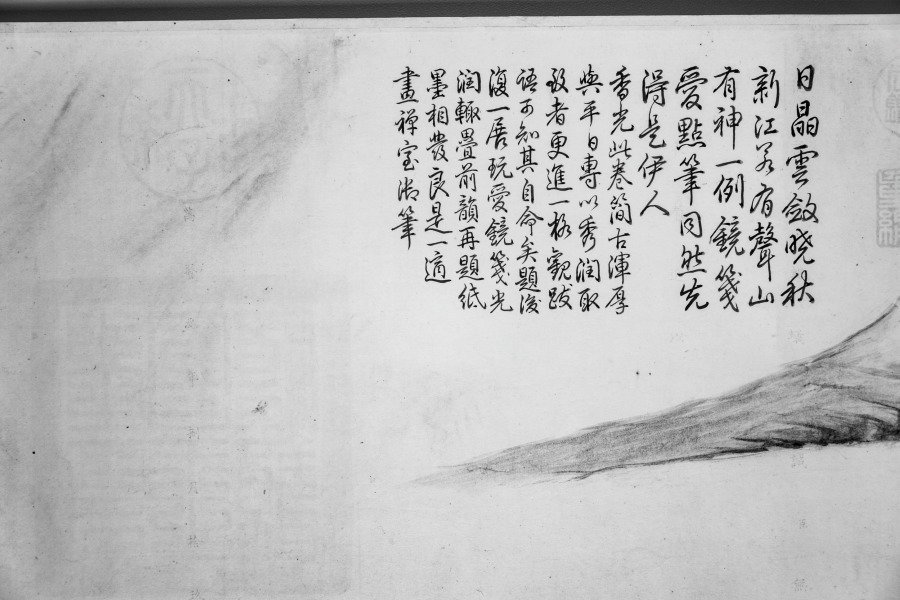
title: River and Mountains on a Clear Autumn Day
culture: China, Ming dynasty (1368–1644)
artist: Dong Qichang (Chinese, 1555–1636)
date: c. 1624–27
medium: Handscroll; ink on Korean paper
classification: Painting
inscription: 黃子久江山秋霽似此，當恨古人不見我也。思翁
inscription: 董文敏每遇高麗鏡面箋，書畫尤為入神。此卷改表紙用之，字跡隱然，兼有朝鮮之印。至於筆法圓秀，真接倪黃。豈文沈所可同日而語也。 康熙庚午中秋後一日，天氣澄爽，重裝初畢，跋於瓶廬。抱瓮翁高士奇。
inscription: Second inscription by Gao Shiqi 高士奇 (1645–1704): On the twenty-third day of the ninth month, the jiaxu year of the Kangxi era [1694], I packed my bags to head north. When my boat passed Wuchang [Suzhou], Mr. Mantang [Song Luo] brought wine to bid me farewell so that we could share our thoughts on our separation in the last few years. I showed him the paintings and calligraphy which I collected and asked his opinions. Since Mr. Mantang does not own any handscrolls by Wenmin [Dong Qichang], I leave this one for him in commemoration of our parting; thus the painting will have a worthy owner and our meeting will become a beautiful story in the future. It is the fourth day after the beginning of winter, with the sky clear and sober. Trees under frost have turned red and yellow, seemingly echoing the brush and ink in the painting. I also ask Mr. Mantang to inscribe a poem to commemorate our meeting so that it will survive forever.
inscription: 1 colophon and 4 seals of Song Luo 宋犖 (1634–1713): Who is the foremost art connoisseur of our dynasty?/ Tangcun [Liang Qingbiao, 1620–1691] is dead, so the title passes to Jiangcun [Gao Shiqi]./ Leaving office, you retired for five years in the Lake region./ Fondling handscrolls and hanging scrolls from morning to evening./ You sent me your collection catalogue Xiao Xia Lu last year;/ It is indeed the true equal of [Zhou Mi's] Yun Yan Guo Yan./ This year you returned to the capital by imperial order;/ Your boat with calligraphy and paintings anchored at the river bank in Suzhou./ When we met each other you did not waste any time for conversation by poured out immediately/ From your "coral net" extraordinary treasures./ You produced incomparable scrolls, with gold-inscribed labels and jade rollers,/ Pouring out from bags and trunks, they were spread in disarray./ Without a word, I rolled and unrolled until my fingers were numbed,/ We sat straight, facing each other quietly, and never felt tired./ For three days we forgot about sleeping and food./ And at times we shouted our joy out loud, forgetting who is host or guest./ Your Dwelling in the Fuchun Mountains and the Yuansheng manuscript/ These peerless works I myself examined with delight./ As an added pleasure to the farewell dinner under the Maple Bridge,/ You allowed me to hold again this handscroll by Dong Qichang--/ The Misty River and Piled Peaks [by Zhao Mengfu] and this Clear Autumn Day are two extraordinary masterpieces./ In showing such life and spirit with "qi yun." the artists were truly "men of heaven."/ The Clear Autumn Day is not even three feet long,/ Painted on tributary Korean paper, it shines like silver./ Every building up and every turn of the mountains imitates nature,/ Every tree and every rock is removed from the commonplace./ From the beginning, the theory of poetry is the theory of painting,/ Like the lotus and the morning sunshine, they complement and refresh each other./ The artist's inscription regrets that "the Old Masters cannot see my scroll."/ Huang Gongwang would have agreed in his grave./ The vermilion of the seals glitter and dazzles the eyes,/ These added accessories are as valuable as jade./ You are very kind to give it to me,/ The feelings expressed in your inscription are so sincere./ Wanting to refuse, but unable, I accept it to respect your wish,/ And taking off my gown and cap I wrapped it with care./ You asked me to write a long poem in commemoration of this beautiful occasion,/ I am too ashamed that my effort in response is so poor and inadequate./ Returning home, I unrolled it under candlelight, trying to write the colophon,/ The light of the waning moon shines at the foot of the mossy wall./ Earnestly humming and brows knit in deep thought, I try to compose;/ The verses are not outstanding, but the facts are real./ With this poem recorded at the end of the scroll, I mail it to you for approval,/ This poem and this painting shall outlast a thousand springs. (Translation by LYSL/HK/WKH)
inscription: 1 colophon and 2 seals of Shao Changheng 邵長蘅 (1637–1704); 2 inscriptions and 14 seals of the Qianlong 乾隆 emperor (r. 1736–95); 1 seal of the Jiaqing 嘉慶 emperor (r. 1796–1820); 3 seals of the Xuantong 宣統 emperor (r. 1908–11); 1 seal unidentified.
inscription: [印] 朝鮮國王之印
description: Dong Qichang had a tremendous impact on the artistic practices and historiography of later generations; his works and writings shaped literati aesthetics. Here, Dong places an abstract landscape composition diagonally across the picture plane, configured to recall earlier masters and simultaneously express his own personal style. Dong’s inscription claims, Huang Gongwang’s Autumn Day, looks like this. I truly regret the master has not seen my work. In fact, Dong Qichang may have had Dong Yuan’s Xiao and Xiang Rivers in mind, a work he owned and considered a key work in Chinese art history.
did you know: The painting has an imprint of a Korean seal that reads "Seal of the king of Joseon."